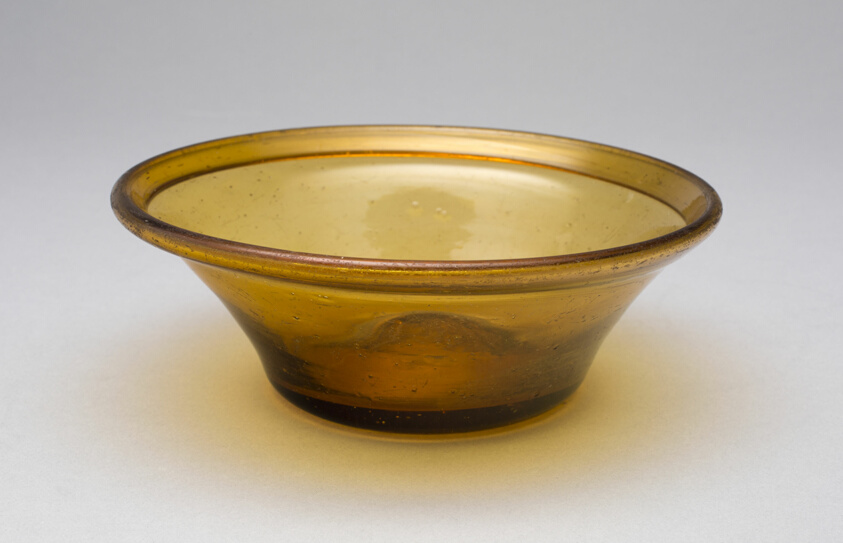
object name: Glass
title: Pan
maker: Mantua Glass Works (Manutua, Ohio, 1821–1829)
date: c. 1825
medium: Blown glass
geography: Mantua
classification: container; glass; american decorative arts; american arts; decorative arts